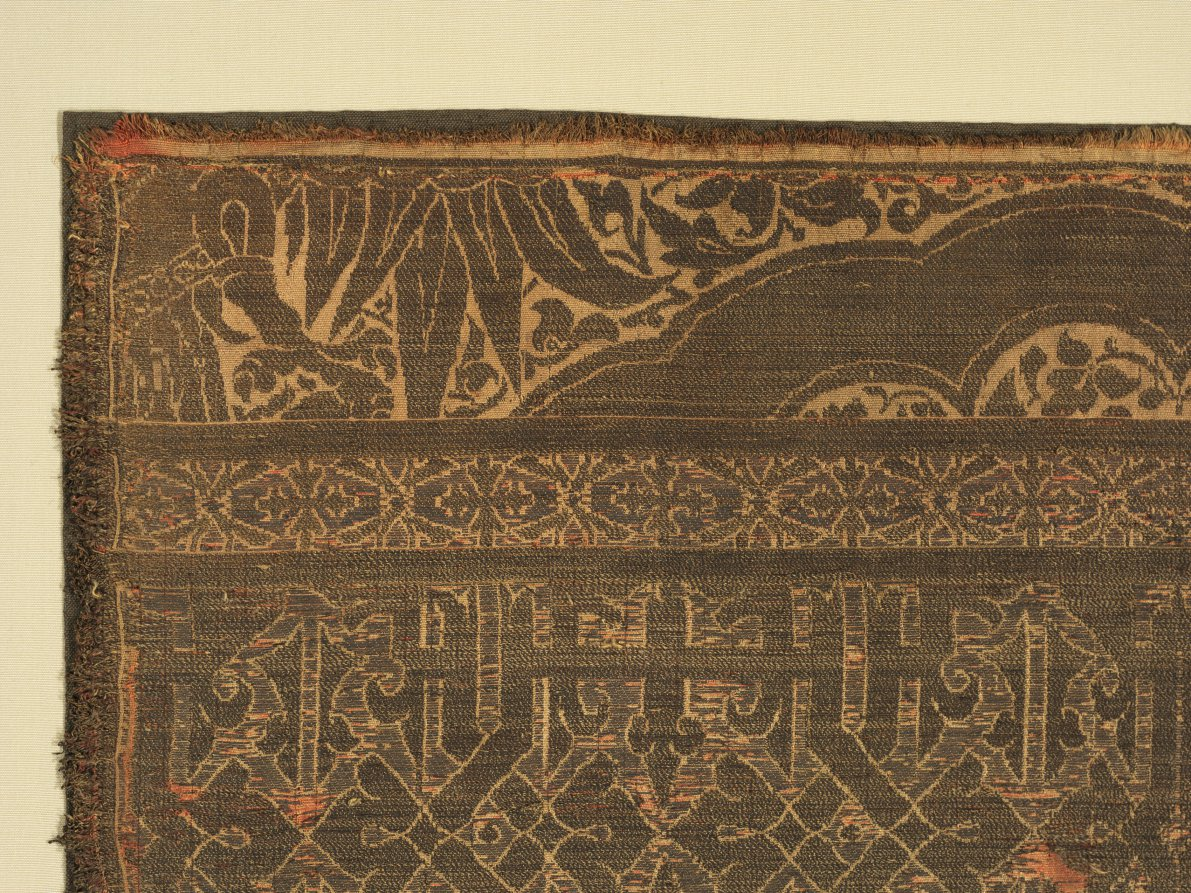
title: Cloth of gold with felines and eagles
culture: Northeast Iran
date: 1225–75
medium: Silk and gold thread: lampas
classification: Textile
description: Mongol taste for luxury was equated with gold, symbol of imperial authority, power, and legitimacy. This splendid cloth of gold-exceptionally large and luxurious-may have enriched the interior of a palace or a majestic tent. The golden pattern, although tarnished on the faded red silk ground, features scalloped medallions with felines whose long tails terminate in dragons’ heads amid elegant floral vines. Double-headed eagles form interstitial motifs on the floral ground. A radiant gold-on-gold band of pseudo-Arabic script enriches the top, woven with gold strips wrapped around a silk core on a ground of flat strips of gold, immediately beneath the pattern testing area.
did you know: Mongol cloths of gold, called nasji, incorporate Iranian, Central Asian, and Chinese features, reflecting the effects of gift exchanges and international commerce.